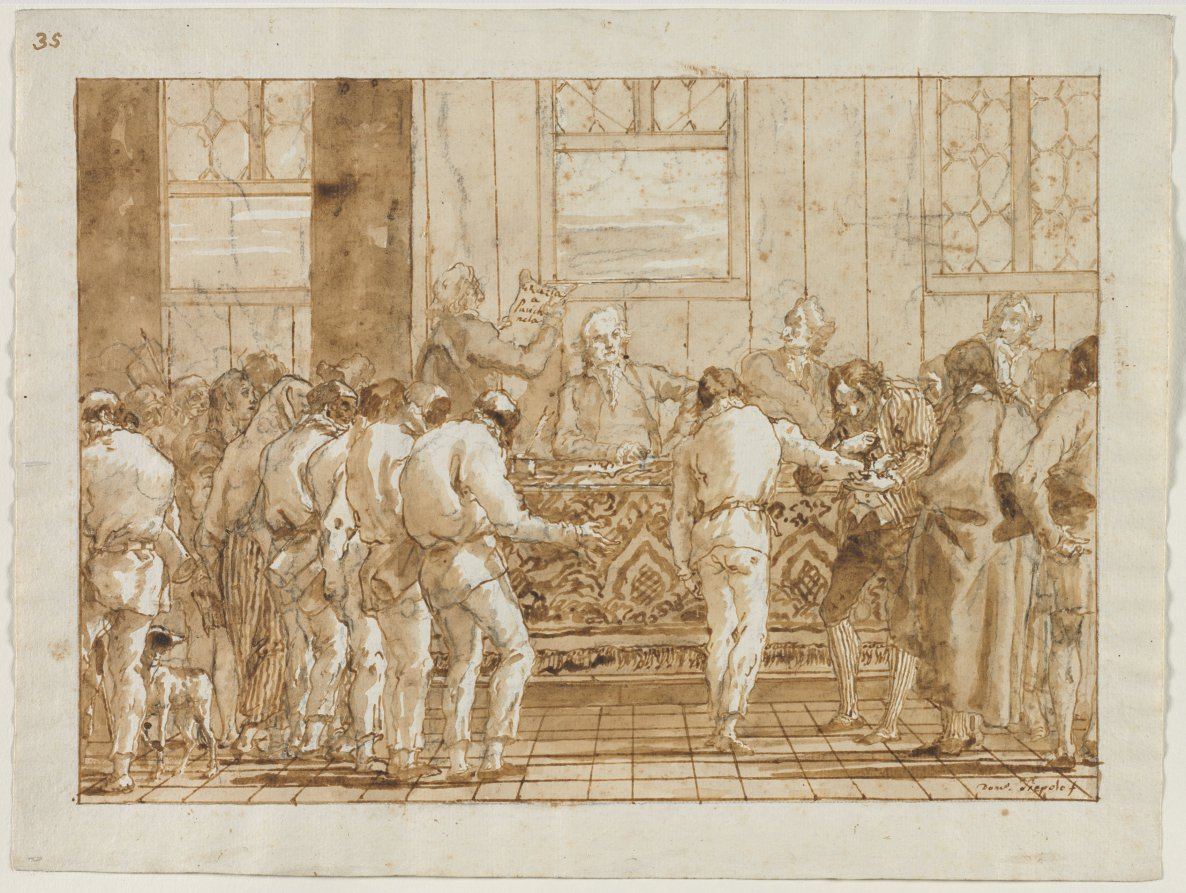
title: The Trial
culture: Italy, 18th century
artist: Giovanni Domenico Tiepolo (Italian, 1727–1804)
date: 1790s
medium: pen and brown ink and brush and brown wash, with black chalk; framing lines in brown ink over graphite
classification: Drawing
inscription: signed, lower right, in brown ink: Dom°. Tiepolo f ; by artist, center, in brown ink: Grazia a Pu[ci?]ch / nela ; upper left, in brown ink: 35 ; upper left, in graphite: o ; lower left, in graphite: -o ; VERSO, upper right, in blue crayon: 6